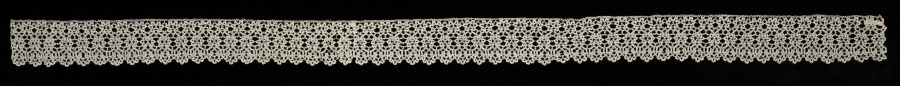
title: Lace Edging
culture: Italy, Genoa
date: 1600s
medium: Linen: bobbin lace (tape lace design)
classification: Lace